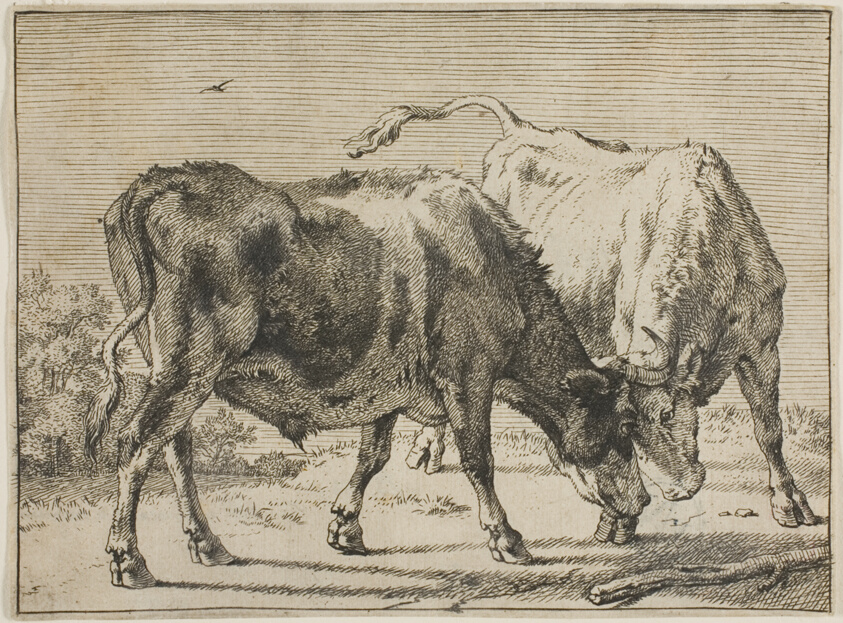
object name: Print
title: Two Bulls Fighting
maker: Paulus Potter (Dutch, 1625-1654)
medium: Etching on ivory paper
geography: Holland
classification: print; prints and drawing; etching